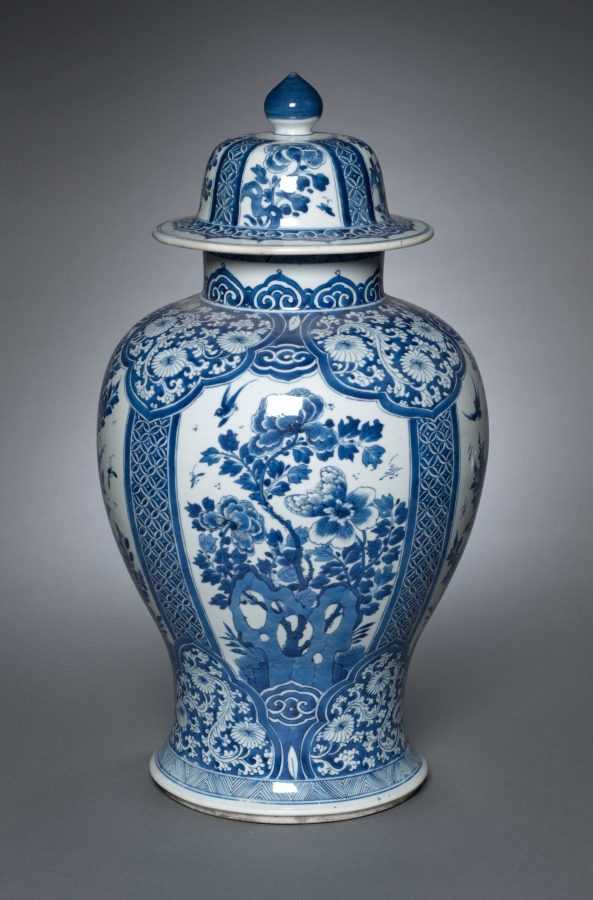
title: Vase with Cover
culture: China, Jiangxi province, Jingdezhen kilns, Qing dynasty (1644–1911), Kangxi reign (1662–1722)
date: 1662–1722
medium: porcelain with underglaze blue decoration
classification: Ceramic